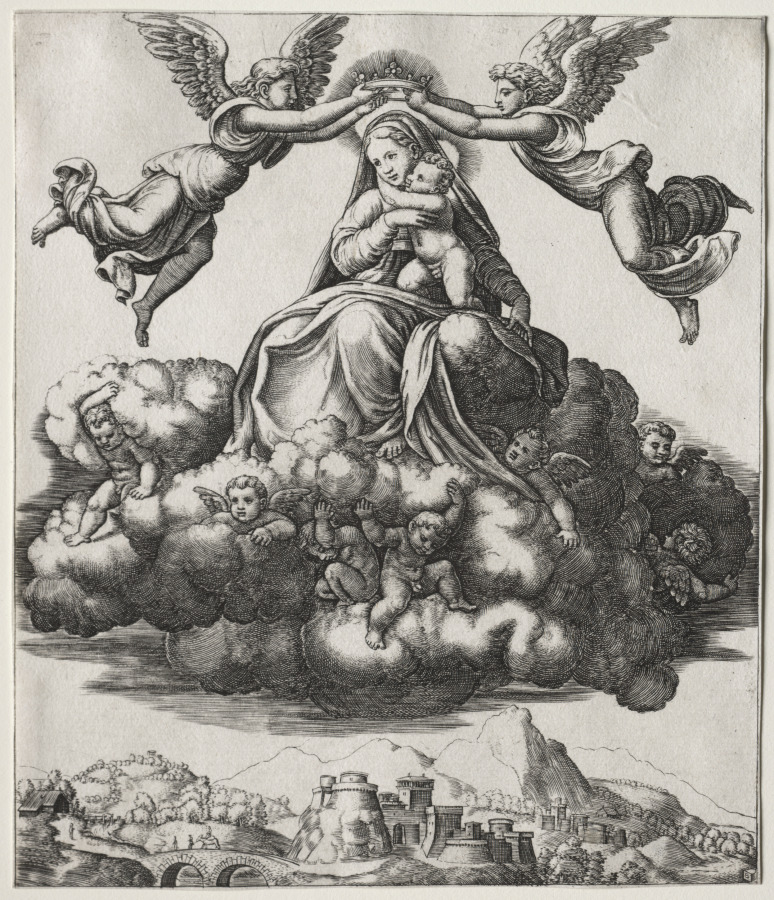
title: The Virgin in Glory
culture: Italy, 16th century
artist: Master of the Die (Italian, active about 1530–60)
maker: after Raphael (Italian, 1483–1520)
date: 1530–60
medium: engraving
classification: Print